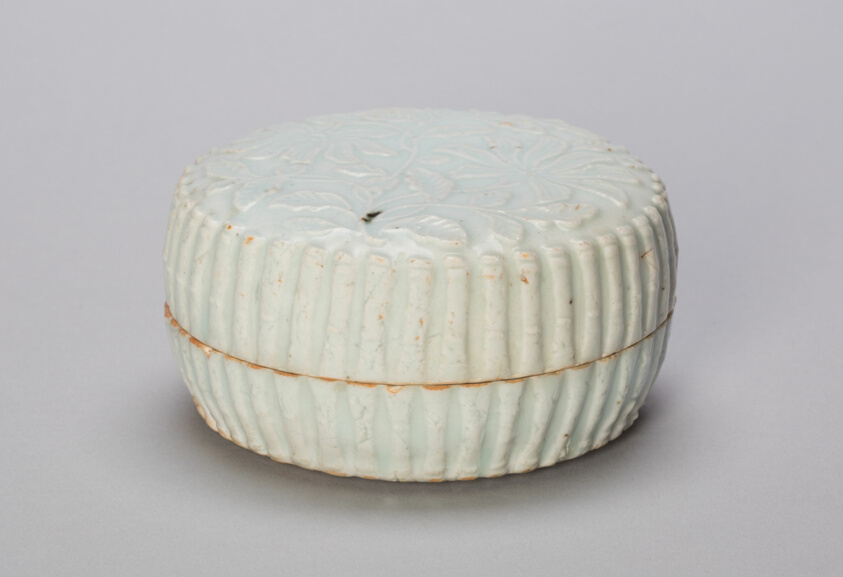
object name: Vessel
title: Lobed Cosmetic Box with Peonies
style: Chinese (culture or style)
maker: China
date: Southern Song (1127–1279) or Yuan dynasty (1271–1368), 13th/14th century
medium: Qingbai ware; porcelain with underglaze molded decoration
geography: China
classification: ceramics; vessel